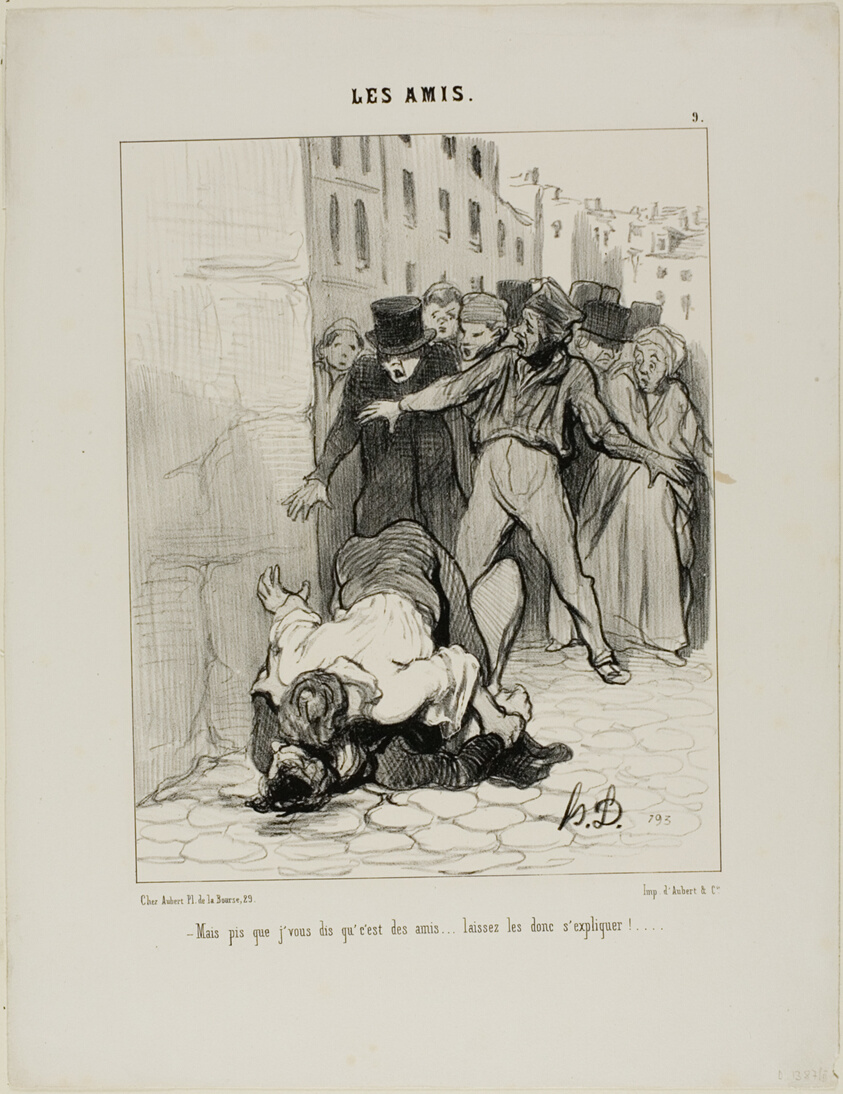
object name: Print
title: “- But I am telling you, they are friends.... they are just expressing themselves to each other,” plate 9 from Les Amis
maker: Honoré Victorin Daumier; French, 1808-1879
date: 1845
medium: Lithograph in black on white wove paper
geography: France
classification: lithograph; print; prints and drawing